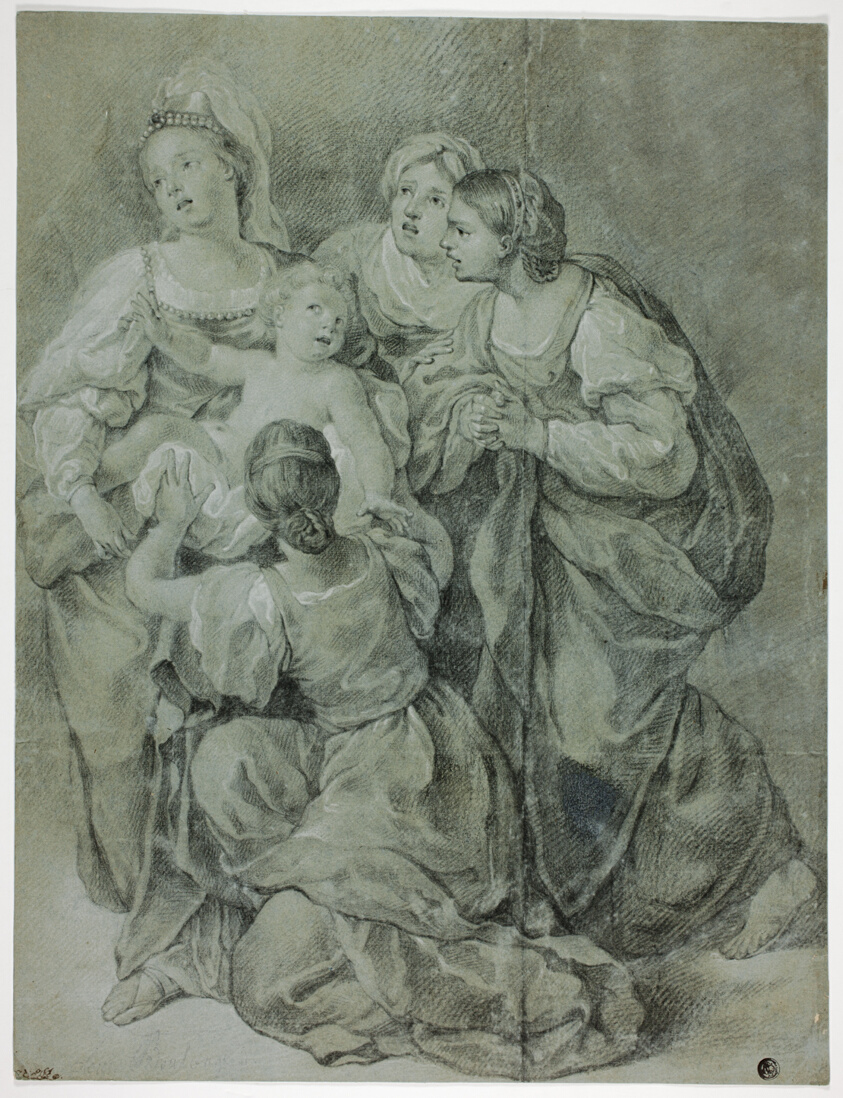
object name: Drawing and Watercolor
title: Group of Four Women and Child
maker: After Domenichino; Italian, 1581-1641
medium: Black chalk heightened with white chalk on blue laid paper, laid down on tan wove paper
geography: Italy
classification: chalk; drawings (visual works); prints and drawing